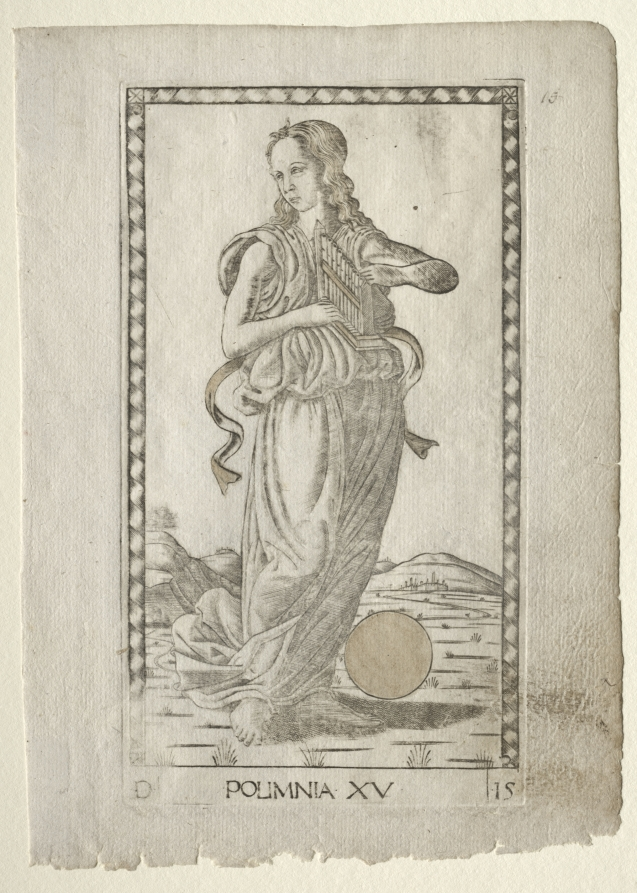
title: Polyhymnia (heroic hymns) (from the Tarocchi series D: Apollo and the Muses, #15)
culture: Italy, Ferrara, 15th century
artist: Master of the E-Series Tarocchi (Italian, active 1460s)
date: before 1467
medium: engraving hand-colored with gold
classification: Print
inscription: Lettered below the image of Polimnia (Polyhymnia, Heroic Hymns): ·D· / ·POLIMNIA·XV· / ·15·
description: This engraving is part of the Tarocchi group marked with the letter “D,” and named Apollo and the Muses. In Greek mythology, the nine Muses (Calliope, Urania, Terpsichore, Erato, Polyhymnia, Thalia, Melpomene, Euterpe, and Clio) were the daughters of Zeus, king of the gods, and Mnemosyne, the Titaness of memory. The Muses were goddesses presiding over different branches of the arts and sciences. Their leader and supervisor was Apollo, the god of light, music, prophecy, and poetry. Here, Polimnia (Polyhymnia) is personified as a full-length female figure, turned to the right, and set in an imaginary hilly landscape. She is playing a portative organ. Polyhymnia was regarded as the Muse of heroic hymns.